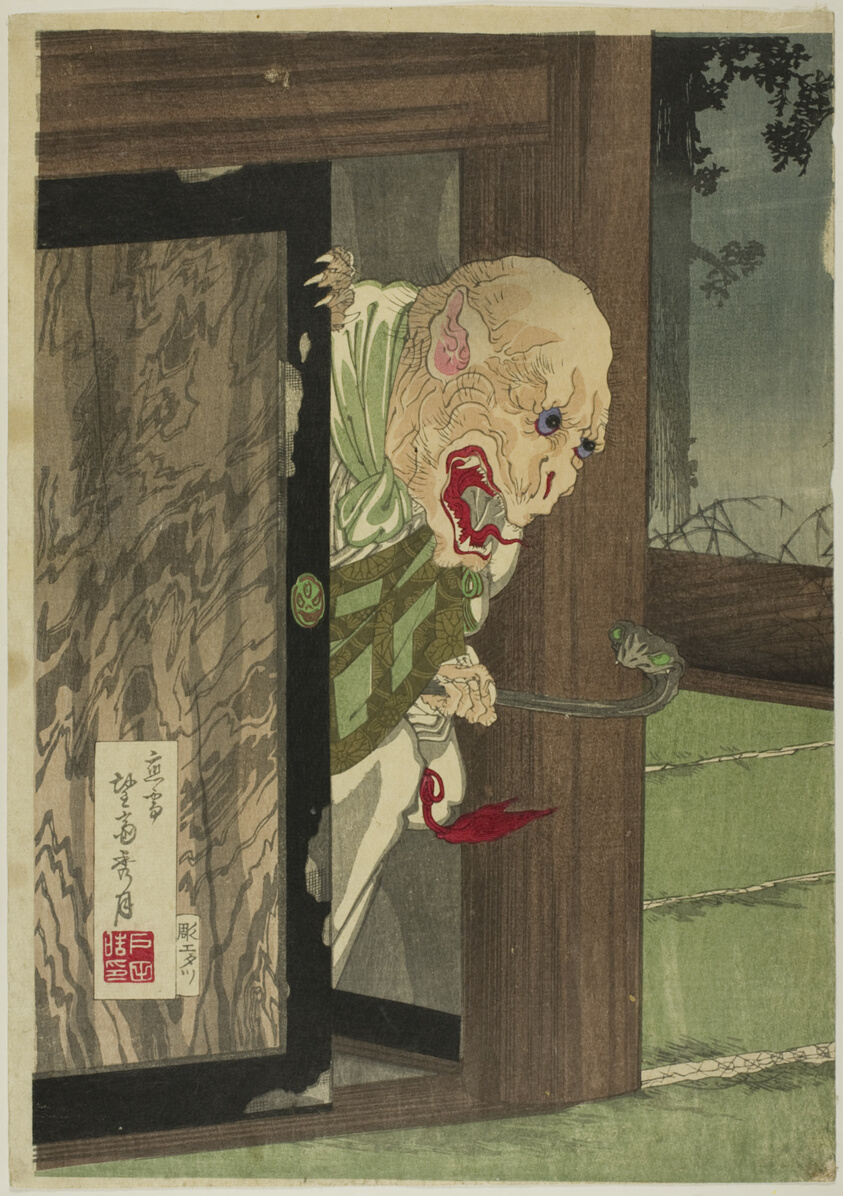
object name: Print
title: Amago buyuden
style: Japanese (culture or style)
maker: Hosai Shugetsu (Japanese, active c. 1880-90)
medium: Color woodblock print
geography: Japan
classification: woodblock print; print